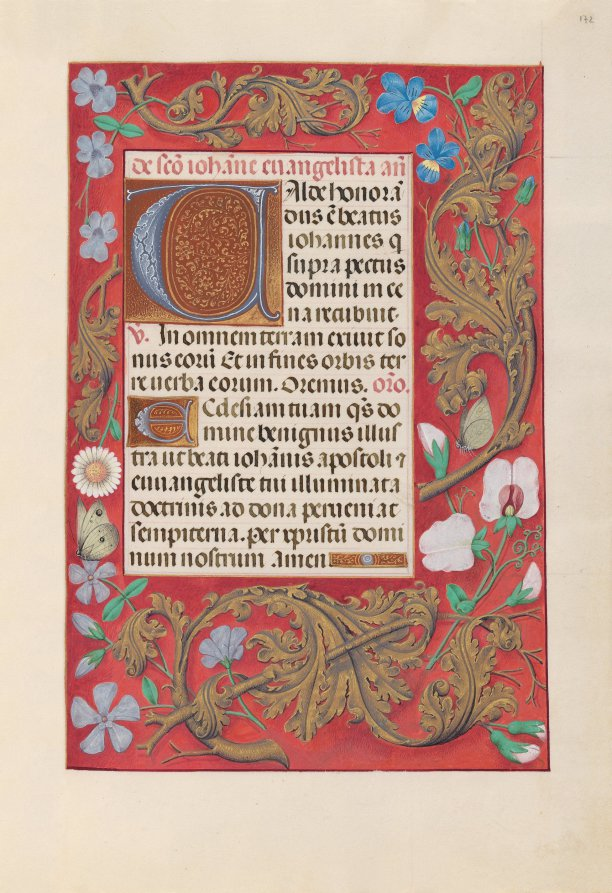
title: Hours of Queen Isabella the Catholic, Queen of Spain: Fol. 172r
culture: Flanders, Ghent and Bruges, late 15th century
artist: Master of the First Prayerbook of Maximillian (Flemish, c. 1444–1519)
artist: and Associates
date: c. 1500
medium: ink, tempera, and gold on vellum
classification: Bound Volume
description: This manuscript was illuminated by a circle of at least five highly organized manuscript painters active in the Flemish cities of Ghent and Bruges. The principal illuminator was Alexander Bening, who painted the majority of the book's miniatures. Manuscripts produced by this circle of artists are renowned for the decoration of their borders, which typically feature a rich variety of realistically-painted flowers, birds, and butterflies. This prayer book, called a book of hours, was intended not for a cleric, but for the private devotions of a lay person-in this case, Isabella the Catholic, Queen of Spain (1451-1504). Isabella's coat of arms embellishes the book's frontispiece. It is unlikely that the book was commissioned by the Queen herself; rather, she probably received it as a diplomatic gift from someone courting her patronage, perhaps Cardinal Francisco Jimenez de Cisneros. A Franciscan friar, Jimenez was dependent upon Isabella for his advancement, first to the post of Queen's confessor in 1492, and then to Archbishop of Toledo in 1495.